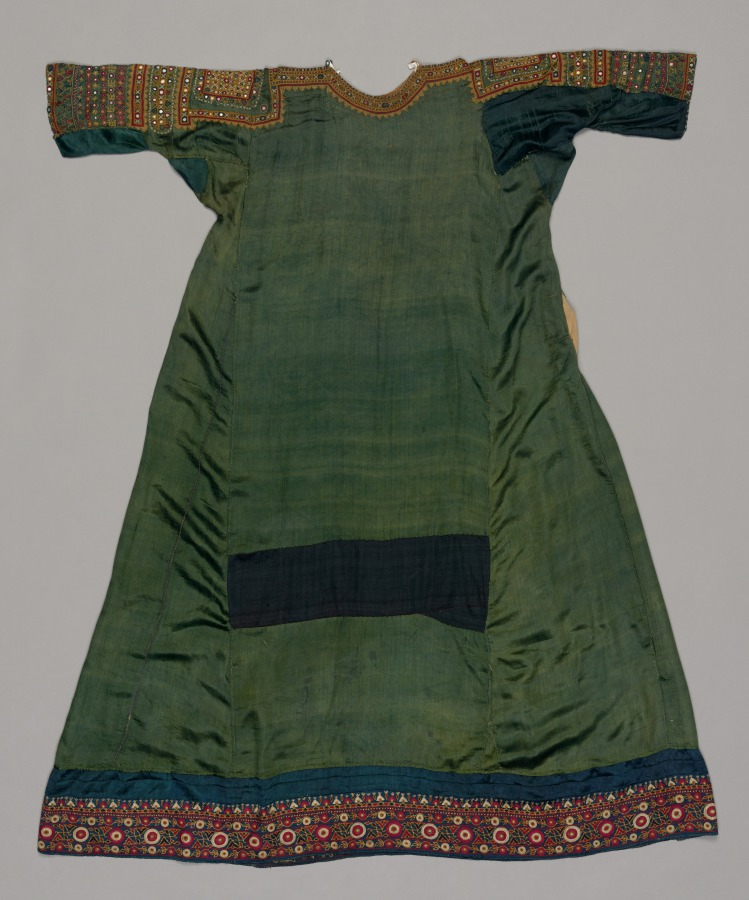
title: Jat Woman's Dress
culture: Western India, Gujarat, possibly Kutch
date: 1800s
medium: silk embellished with mirror work and embroidered with silk in open-chain, stem, basket, and running stitch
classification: Garment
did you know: Pieces of mirror, called abhla in Hindi or shisha in Persian, were favorite embellishments to embroideries and accessories in western India and Afghanistan.